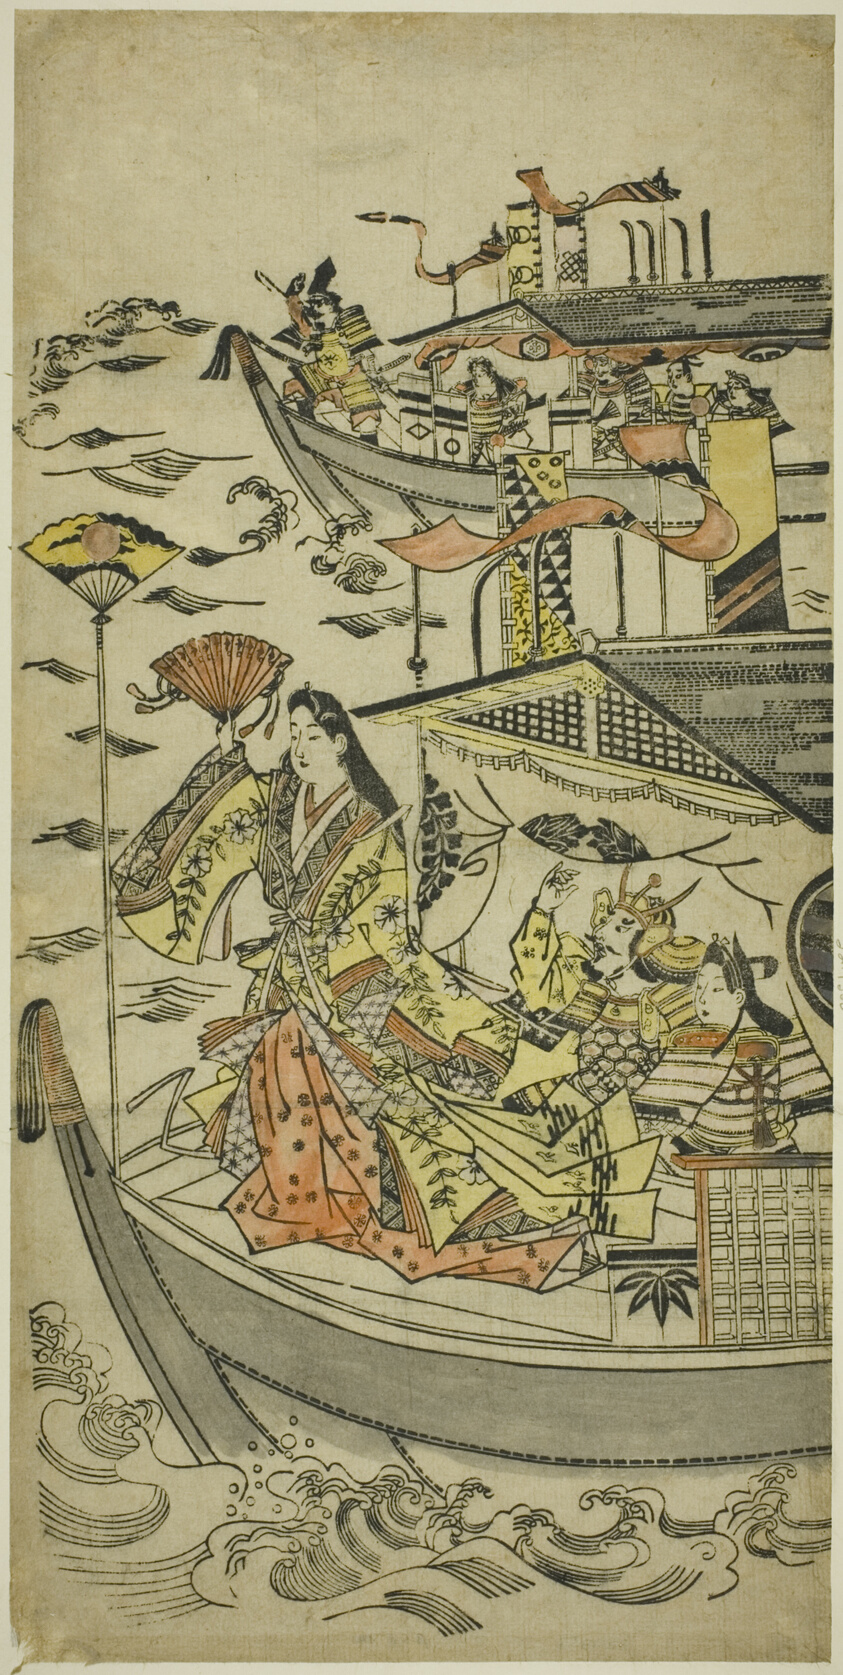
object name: Print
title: Lady Tamamushi raising a fan target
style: Japanese (culture or style)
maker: Attributed to Sugimura Jihei; Japanese, active c. 1681-98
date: c. 1681/98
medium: Hand-colored woodblock print; vertical o-oban, tan-e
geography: Japan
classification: woodblock print; print; asian art